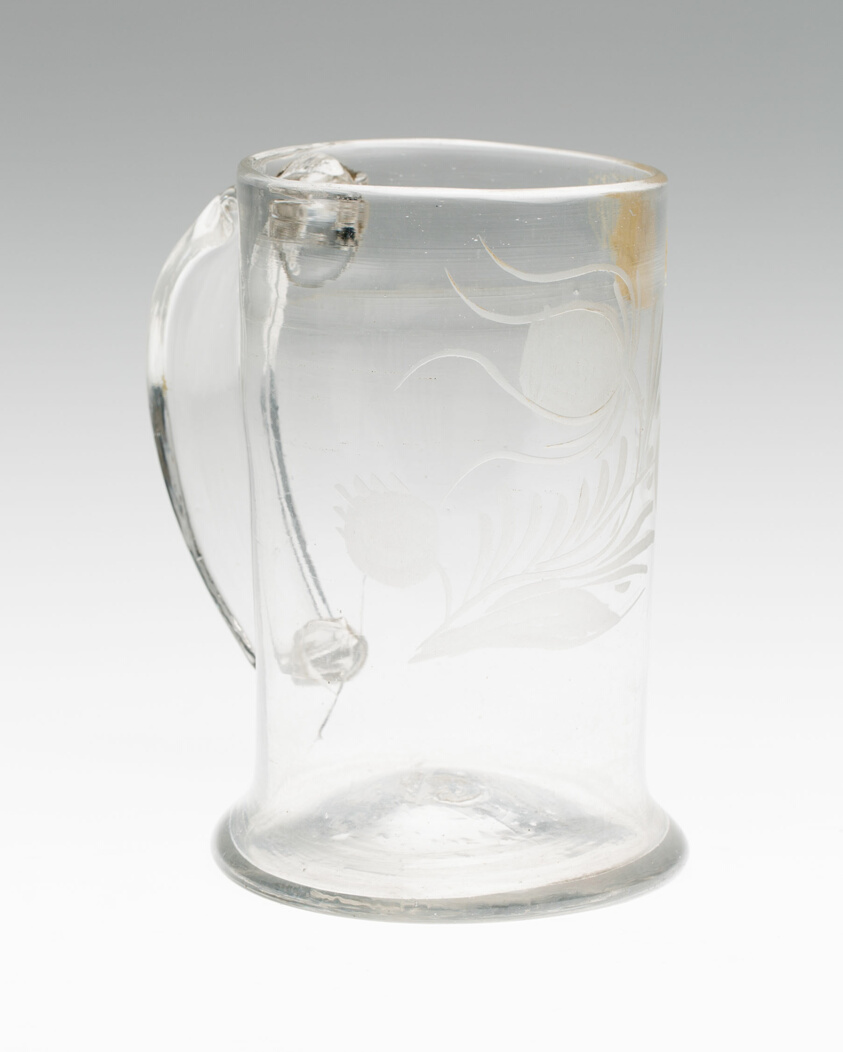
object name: Glass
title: Tankard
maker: Netherlands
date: Mid to late 18th century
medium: Glass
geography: Netherlands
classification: drinking vessel; glass; european decorative arts